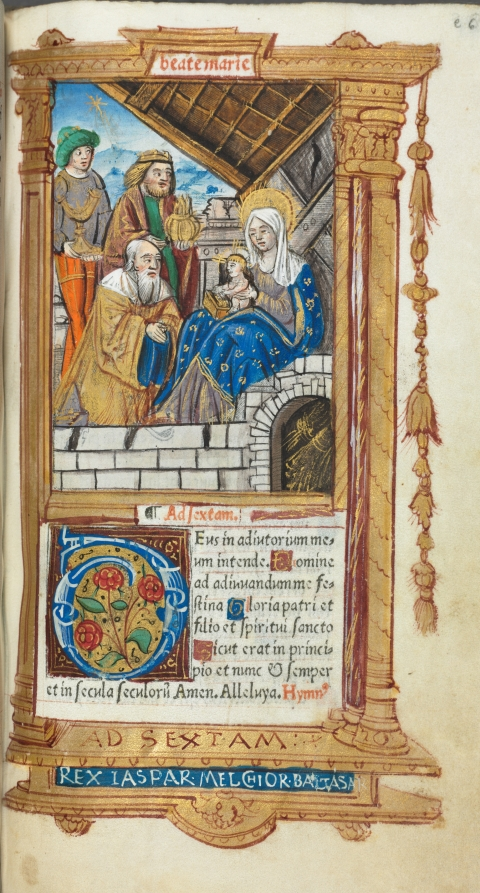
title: Printed Book of Hours (Use of Rome): fol. 38r, Adoration of the Magi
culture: France, Paris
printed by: Guillaume Le Rouge (French, Paris, active 1493–1517)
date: 1510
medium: 112 Printed folios on parchment, bound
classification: Bound Volume